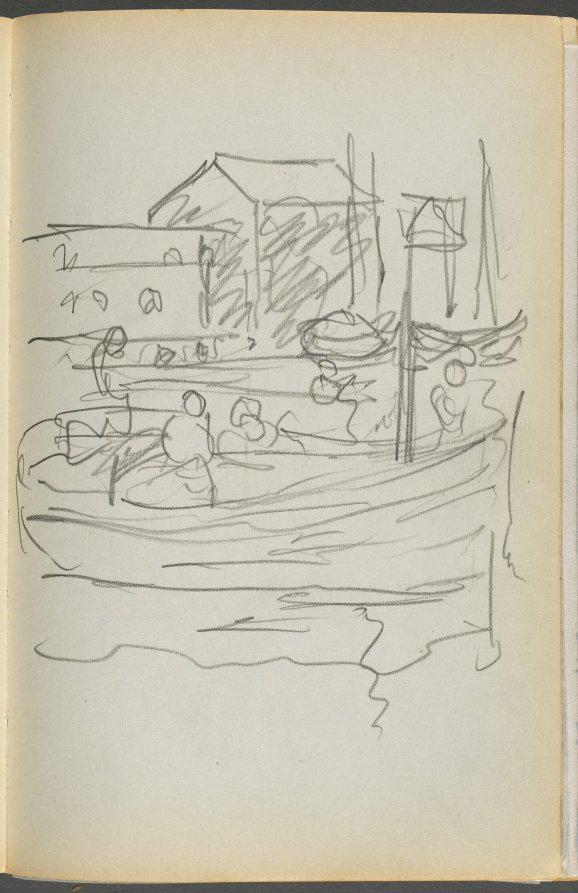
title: Sketchbook- The Granite Shore Hotel, Rockport, page 108: Figures in a Boat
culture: America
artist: Maurice Prendergast (American, born Newfoundland [now Canada], 1858–1924)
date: 1905–10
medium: graphite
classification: Bound Volume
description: This sketchbook contains 72 pages of pencil drawings and 9 watercolors of Cape Ann. On the inside of the cover Prendergast wrote the address of the Granite Shore Hotel in Rockport, Massachusetts.